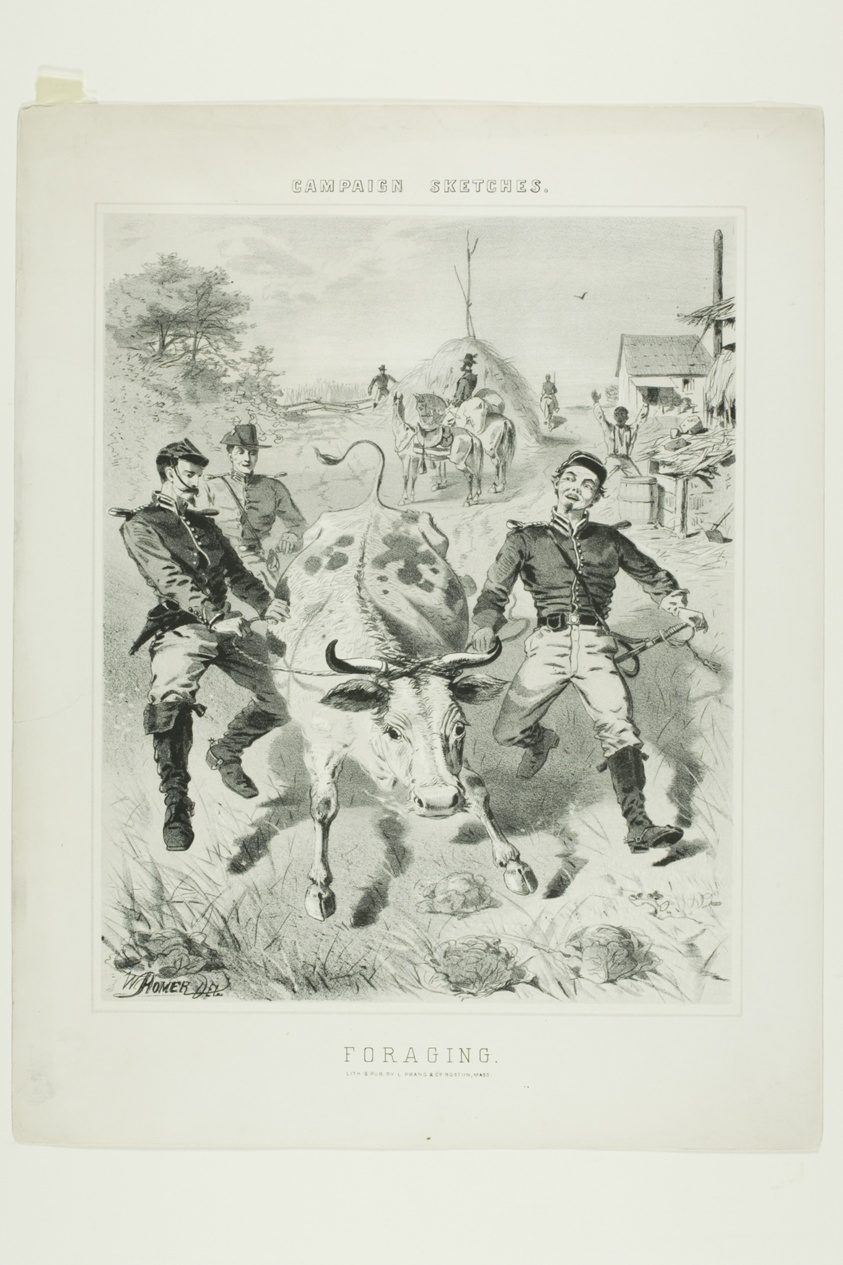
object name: Print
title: Campaign Sketches: Foraging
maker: Winslow Homer (American, 1836–1910)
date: 1863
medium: Tint lithograph on heavy ivory wove paper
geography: United States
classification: lithograph; print; prints and drawing